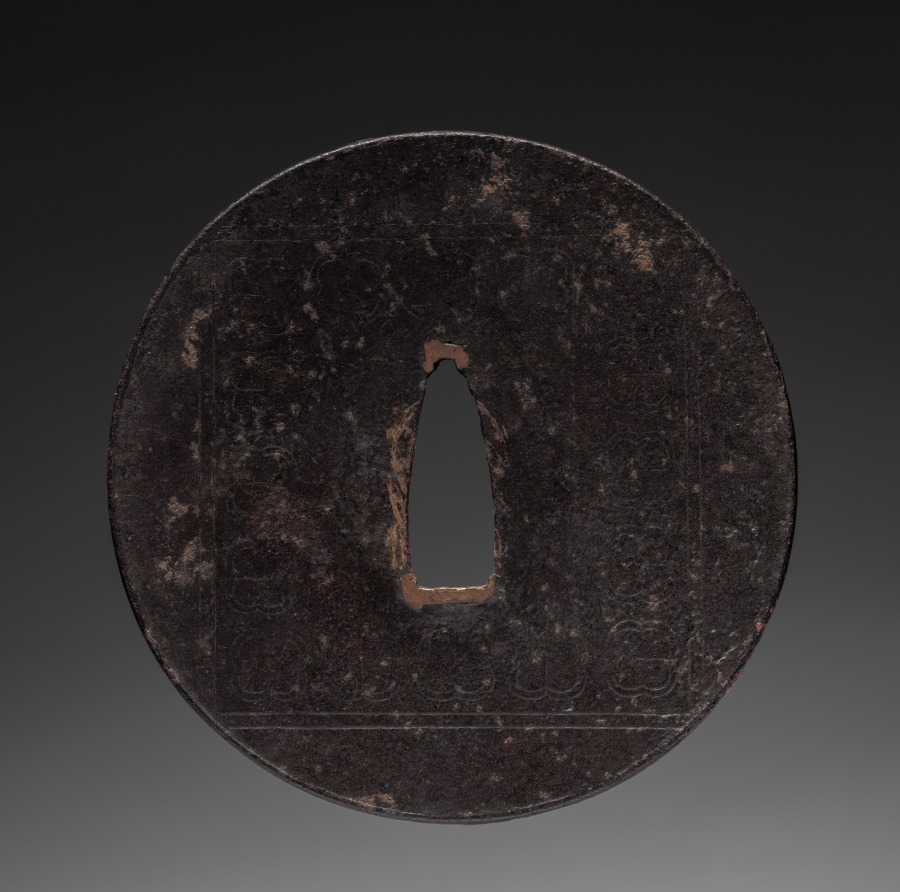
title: Sword Guard (Tsuba)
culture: Japan, possibly Edo period (1615-1868)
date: c. 1615–1868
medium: iron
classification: Arms and Armor